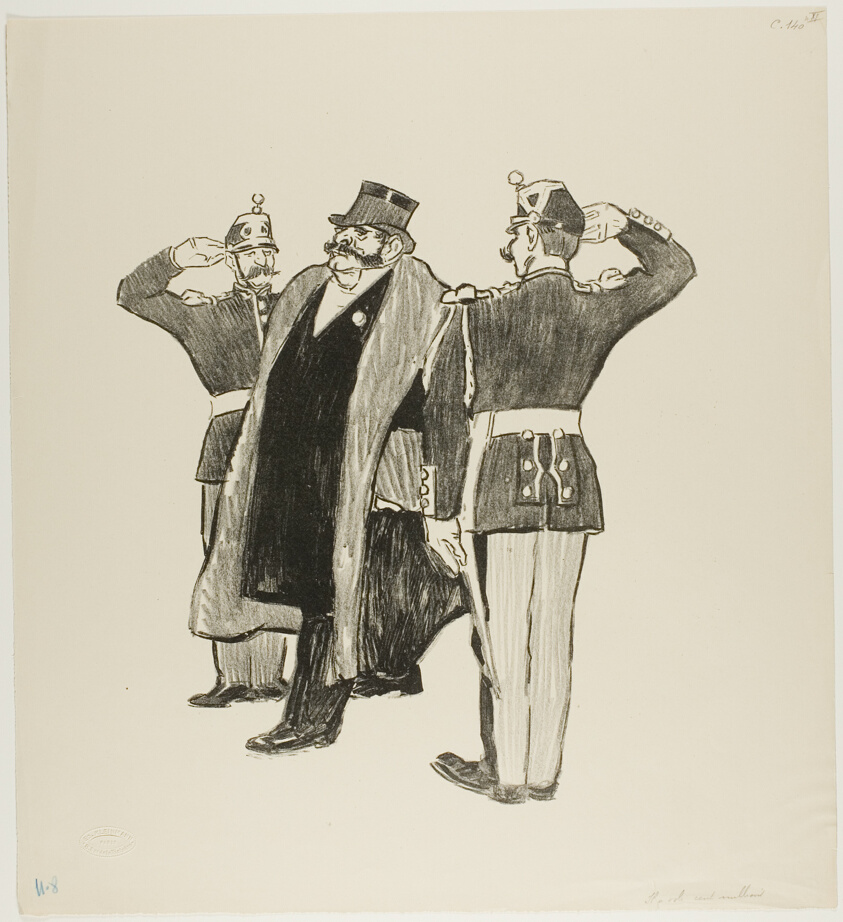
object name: Print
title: One Hundred Million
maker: Théophile-Alexandre Steinlen; French, born Switzerland, 1859-1923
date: February 1894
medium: Lithograph in black with scraping on stone on cream wove paper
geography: France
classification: lithograph; print; prints and drawing